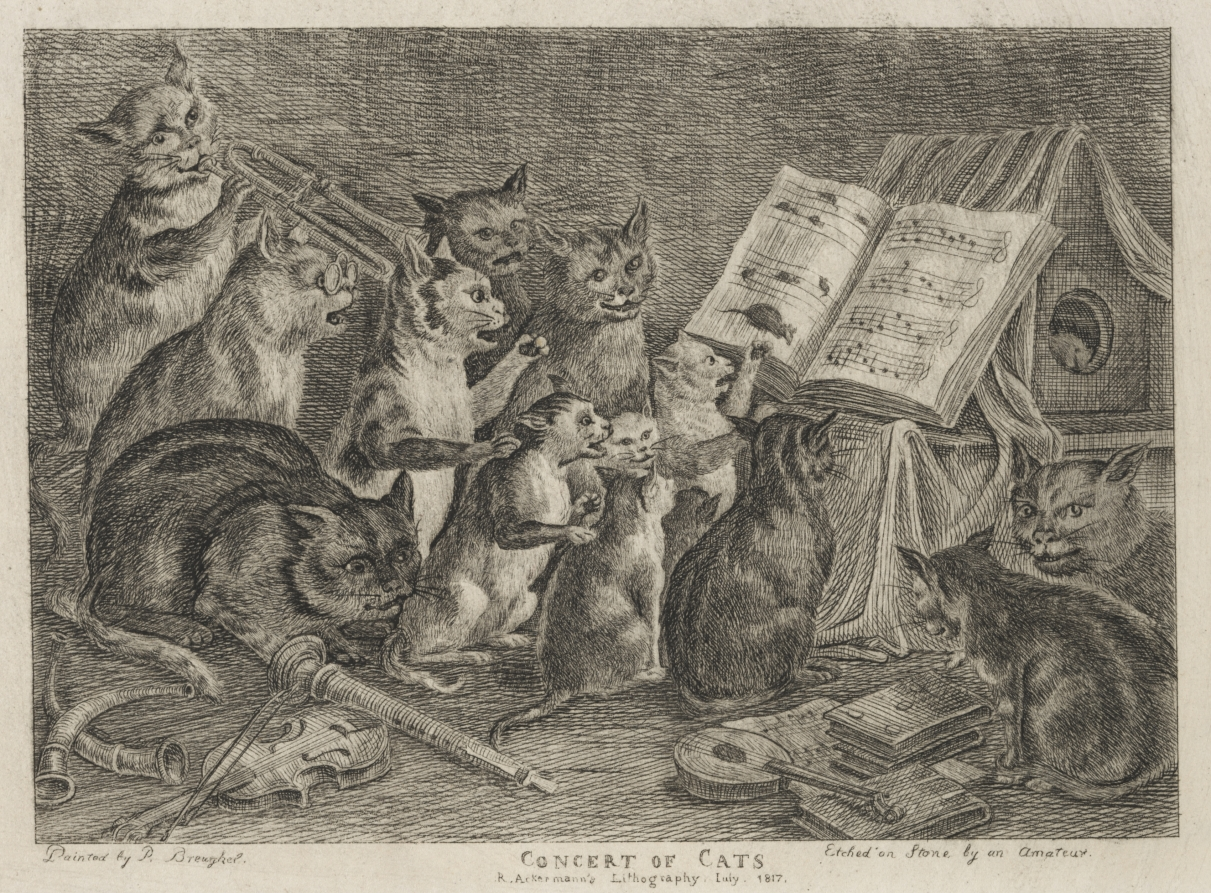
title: Concert of Cats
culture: England(?), 19th century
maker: Rudolph Ackermann (British, 1764–1834)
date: 1817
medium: lithograph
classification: Print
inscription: On stone: Below image, left: Printed by P. Breughel.; below image, center: CONCERT OF CATS ; below image, right: Etched on Stone by an Amateur; below image, bottom center: R. Ackermann's Lithography; July. 1817.